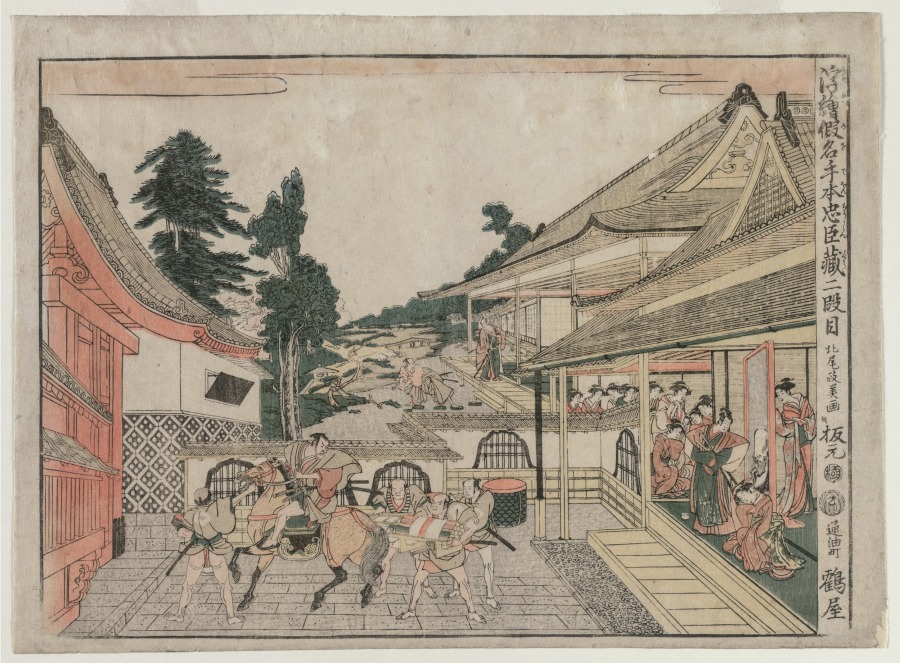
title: Chushingura: Act II (from the series Perspective Pictures for The Treasure House of Loyalty)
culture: Japan, Edo period (1615–1868)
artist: Kitao Masayoshi (Japanese, 1761–1824)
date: c. 1790s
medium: color woodblock print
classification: Print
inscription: Signature: Kitao Masayoshi ga Publisher: Tsuruya Kiemon (hammoto Toriaburacho Tsuruya, emblem) Censorship Seal: kiwame